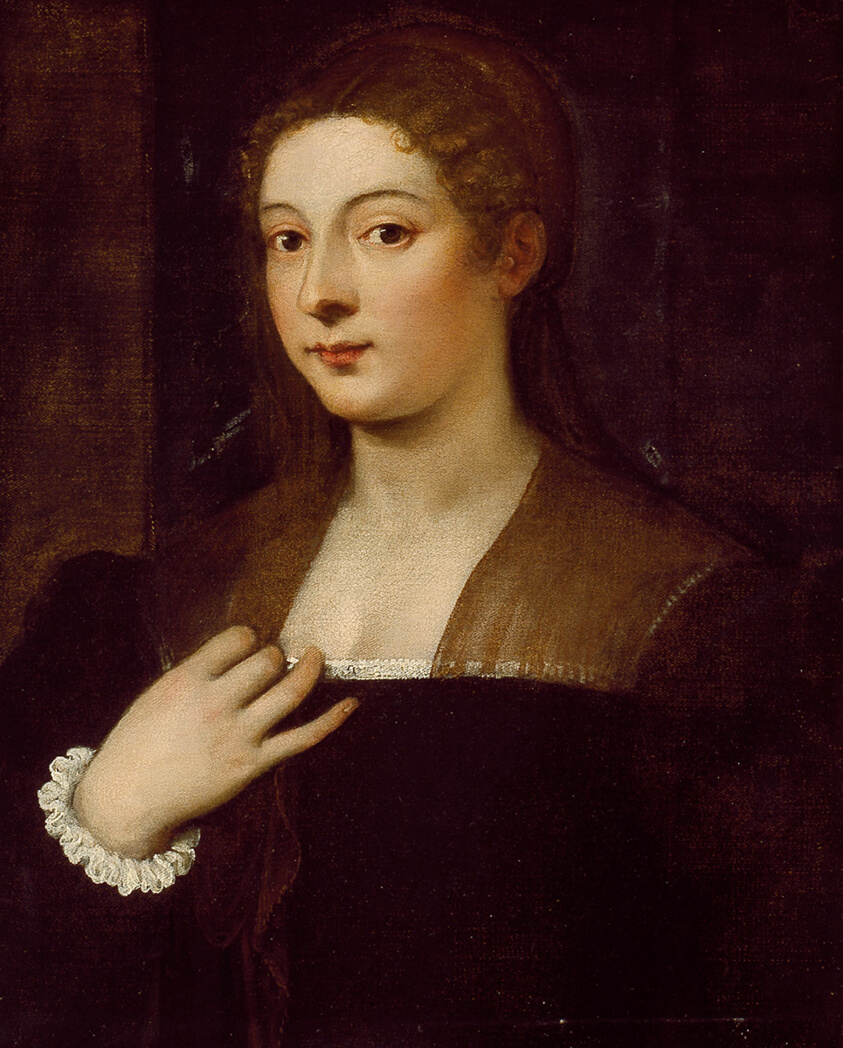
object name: Painting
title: Portrait of a Lady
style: sixteenth century, Renaissance, 16th Century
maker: Titian (Italian, 1477-1576); or Follower of Titian (Italian, 1477-1576)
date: c. 1530/60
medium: Oil on canvas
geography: Italy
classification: oil on canvas; Italian; paint; oil paintings (visual works); portrait; painting; european painting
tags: portraits: female subject, woman, portraits, portrait, lace